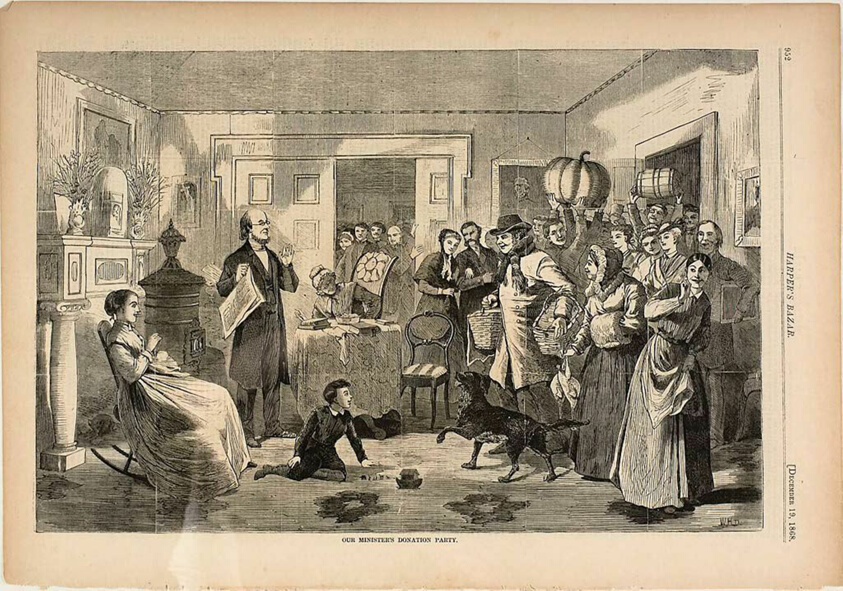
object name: Print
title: Our Minister's Donation Party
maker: Winslow Homer (American, 1836-1910); published by Harper's Bazar (American, founded 1867)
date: published December 19, 1868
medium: Wood engraving on paper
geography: United States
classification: wood engraving; print; prints and drawing